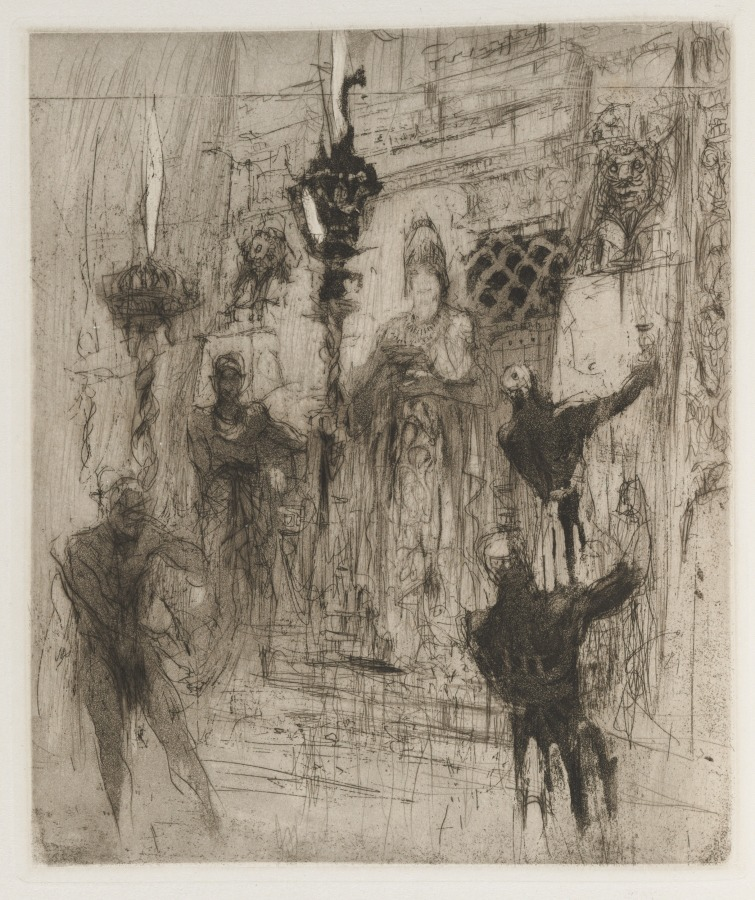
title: Herodias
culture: England, 20th century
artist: William Walcot (British, 1874–1943)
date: 1928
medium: etching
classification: Print